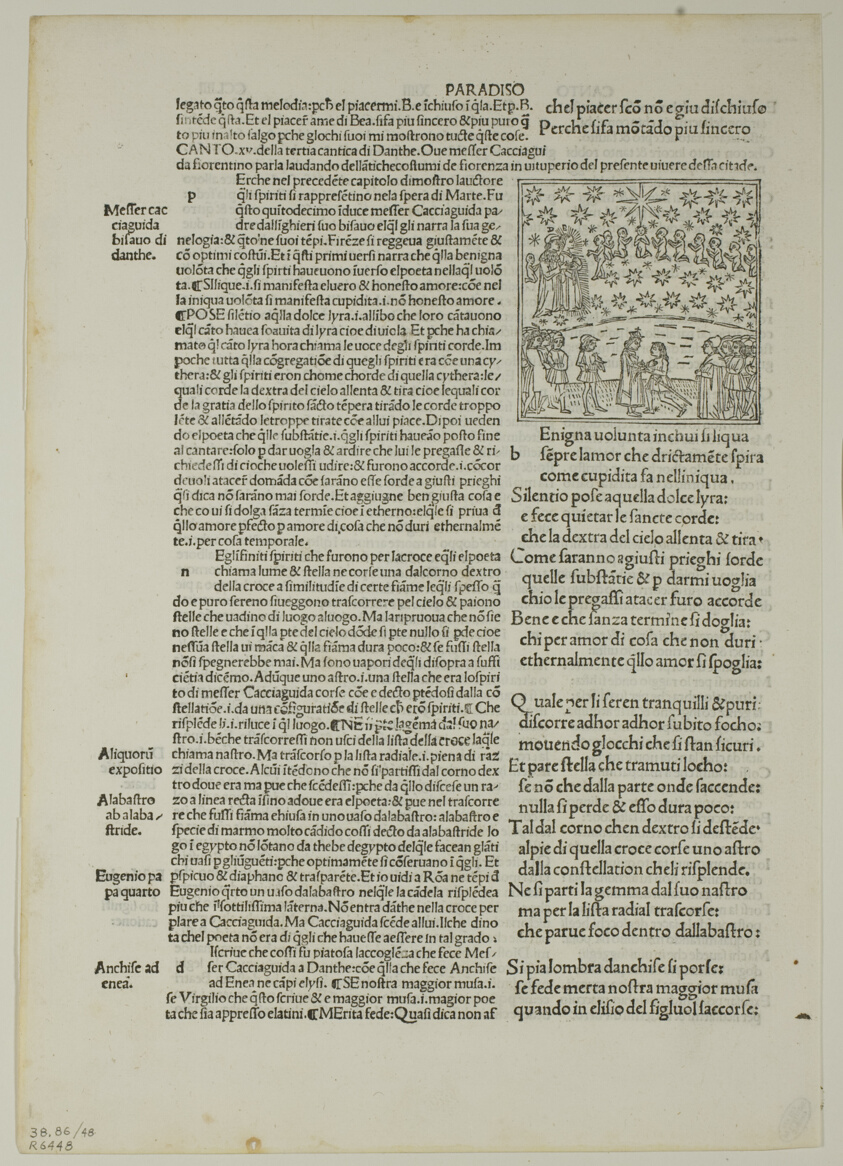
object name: Print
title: Paradise: Canto XV (Fifth Heaven, Sphere of Mars) from Divina Commedia (Divine Comedy), Plate 48 from Woodcuts from Books of the 15th Century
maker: Unknown Artist (Venice, late 15th century); printed and published by Bernardino Benalius (Italian, c. 1458–c. 1543) and Matteo Capcasa (Italian, active 1485–1491); original text by Dante (Italian, c. 1265-1321); portfolio text by Wilhelm Ludwig Schreiber (German, 1855–1932)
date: 1491, portfolio assembled 1929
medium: Woodcut in black, and letterpress in black (recto and verso), on cream laid paper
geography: Italy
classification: woodcut; print; prints and drawing